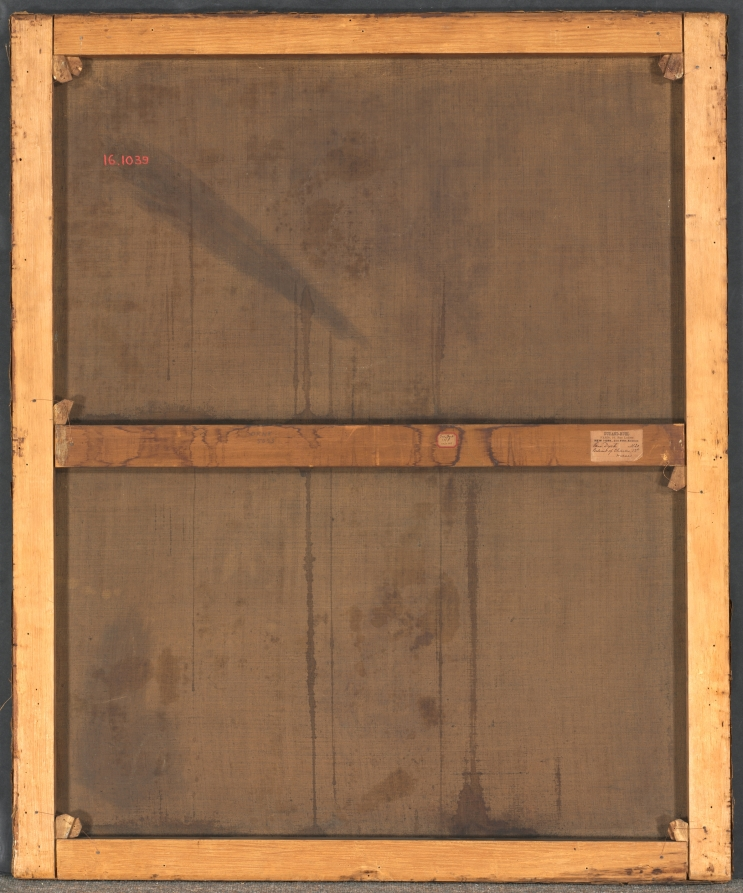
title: Portrait of Charles I (1600–1649)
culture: Flanders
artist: copy after Anthony van Dyck (Flemish, 1599–1641)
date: 1600s or later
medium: oil on canvas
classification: Painting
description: This is a fragment of a copy of van Dyck's portrait of 1632. Originally a double portrait, the painting would have included Charles I's wife, Queen Henrietta-Maria. An avid art collector, Charles I lured many important artists, including van Dyck and Rubens, from the Continent to England. Charles I was beheaded in 1649; however, the monarchy was later restored in 1660 by his son, Charles II.